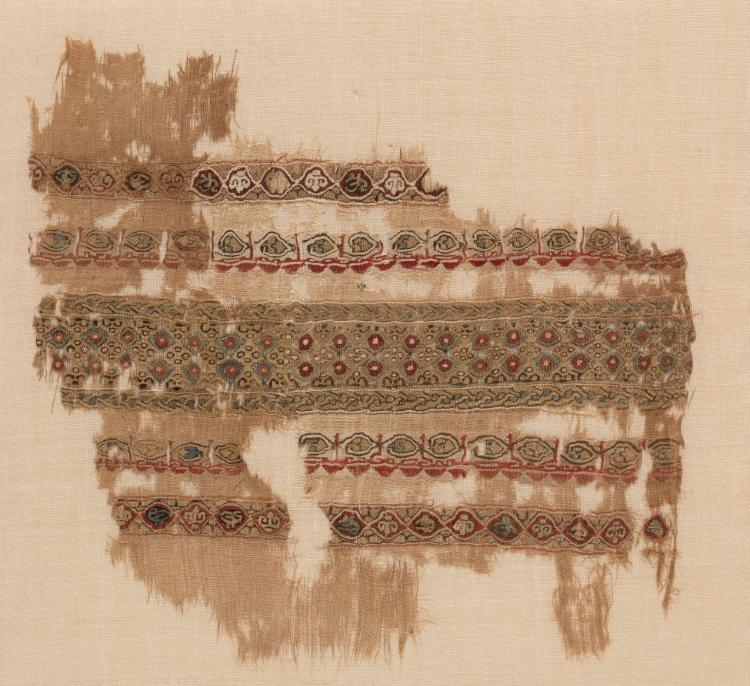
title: Fragment of a Tiraz-Style Textile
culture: Egypt, Fatimid period, 12th century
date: 1100s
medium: tabby ground with inwoven tapestry ornament; linen and silk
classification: Textile